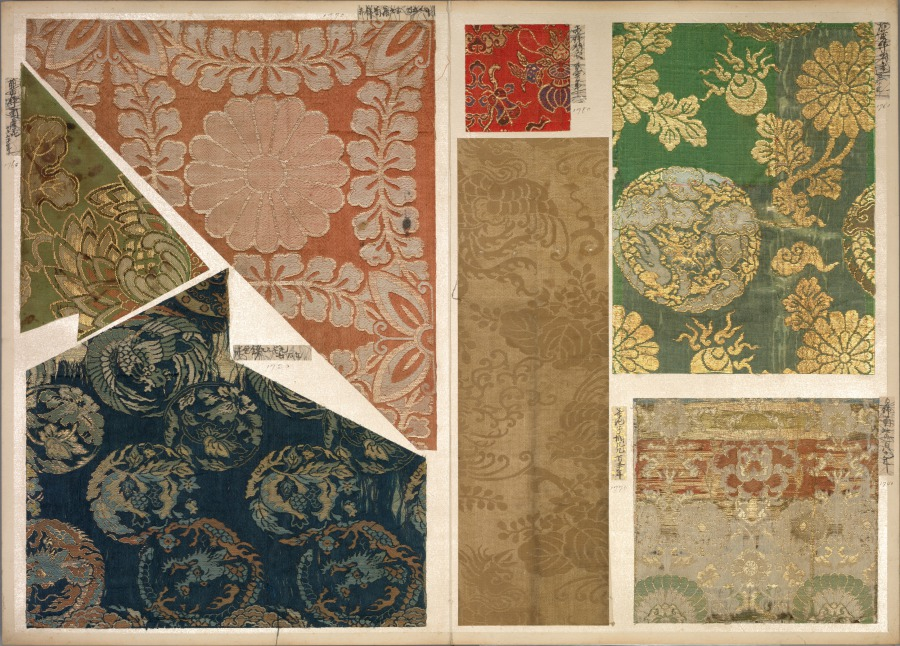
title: Album of Textile Samples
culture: Japan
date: 1790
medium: silk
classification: Textile